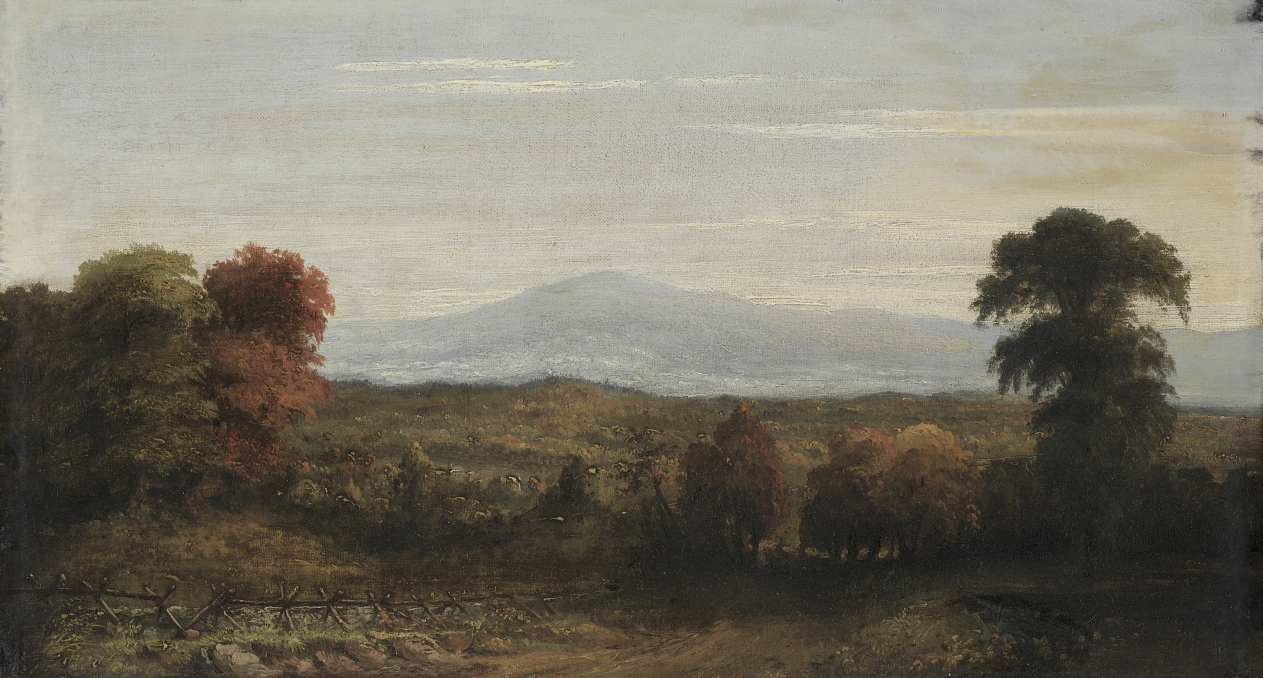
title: Landscape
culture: America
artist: imitator of Jasper F. Cropsey (American, 1823–1900)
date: before 1918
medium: oil on canvas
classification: Painting